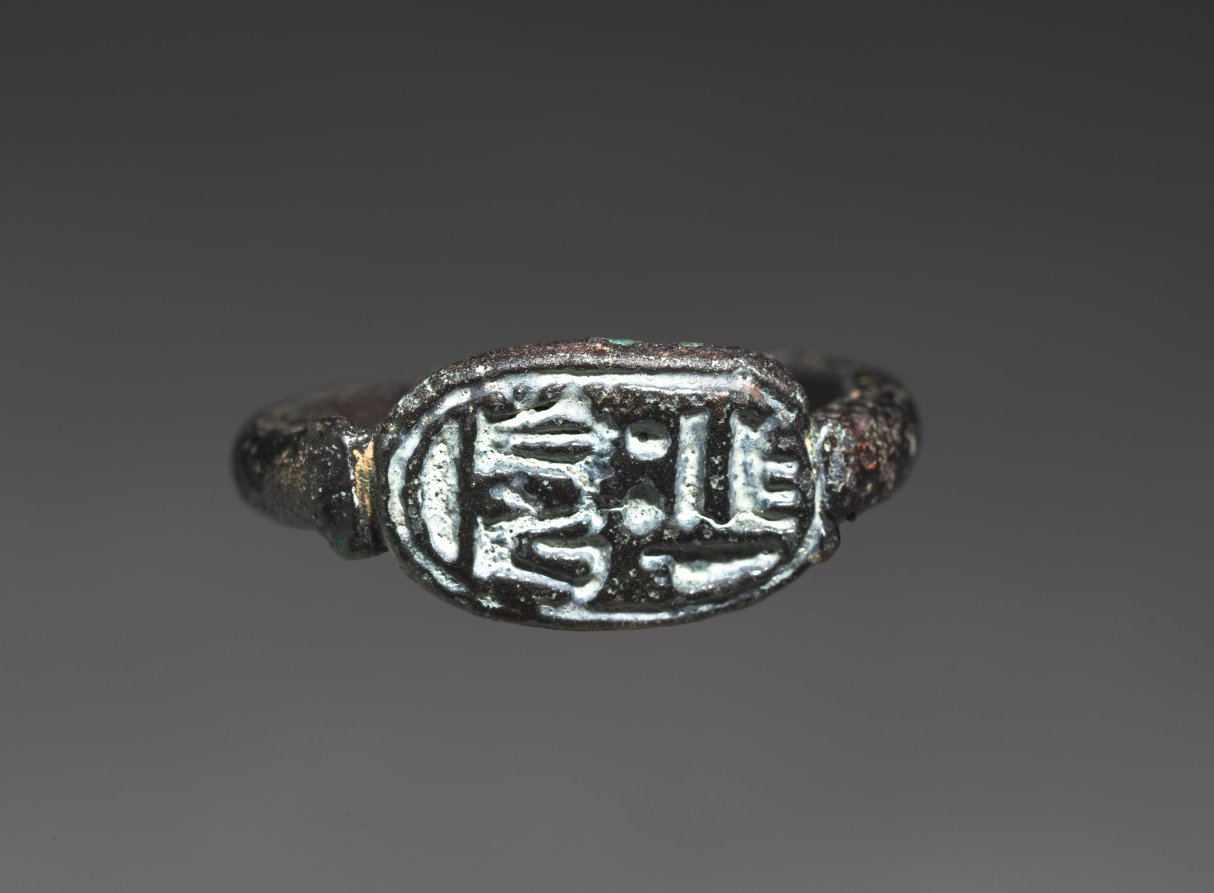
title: Finger Ring of Shoshenq I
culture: Egypt, Third Intermediate (1069–715 BCE), Dynasty 22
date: 945–715 BCE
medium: dark purple faience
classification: Jewelry